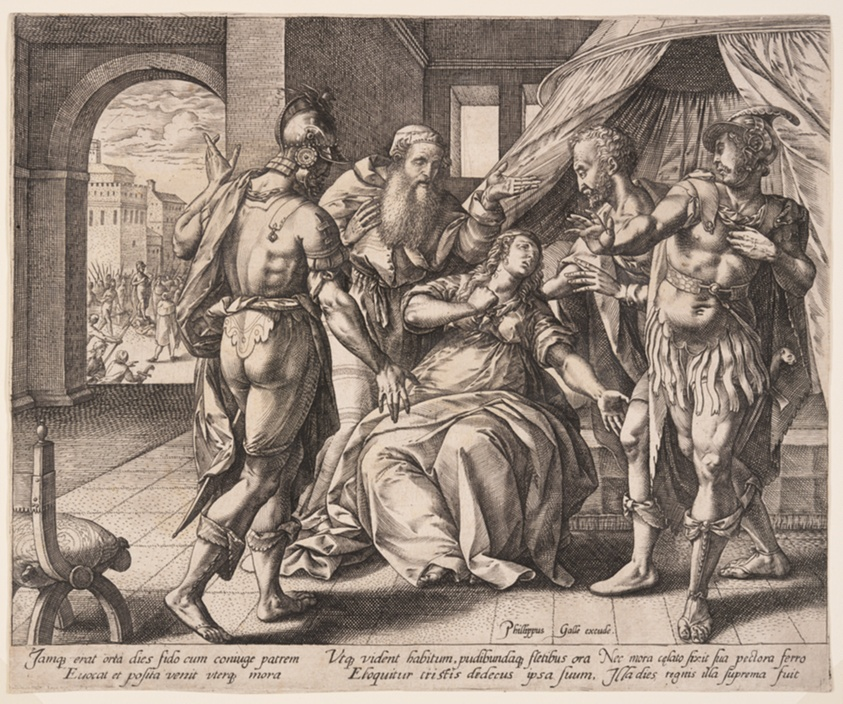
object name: Print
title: Lucretia Killing Herself, from The Story of Lucretia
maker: Hendrick Goltzius (Dutch, 1558–1617)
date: 1578–79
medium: Engraving on laid paper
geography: Netherlands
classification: print; engraving; paper; prints and drawing